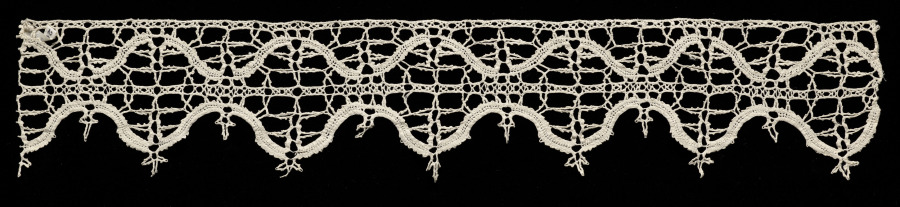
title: Lace Insertion and Edging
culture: Italy, Venice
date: 1600–1640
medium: Bobbin lace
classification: Lace